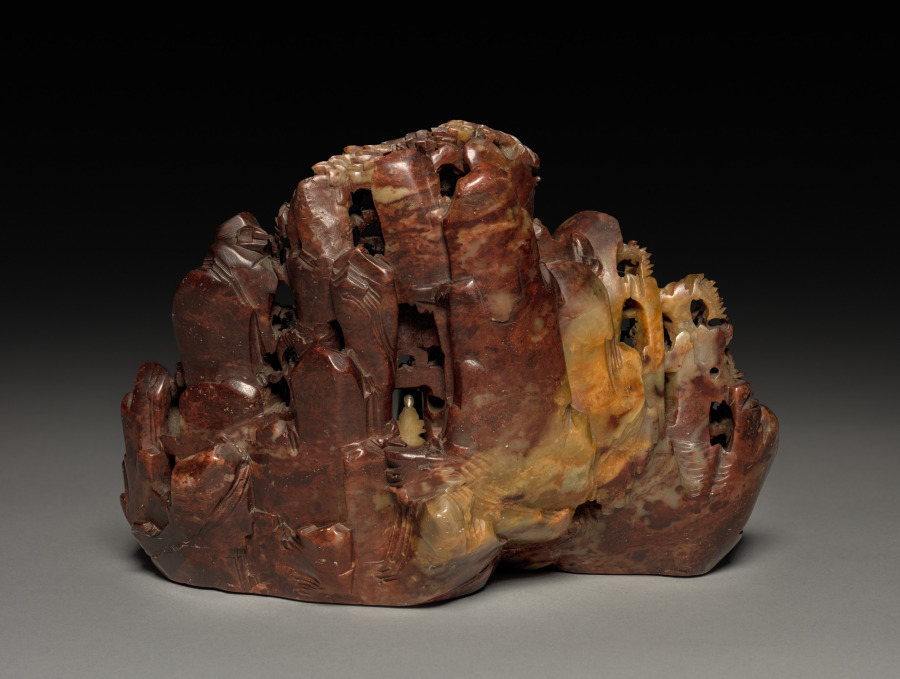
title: Landscape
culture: China, Qing dynasty (1644-1911)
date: 1644–1911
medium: soapstone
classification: Stone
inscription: 石門洞天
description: A mountain scenery surrounded by water and fish is meticulously carved out of soapstone, with a pond, bridge, waterfall, and temple front in its center. The unidentified figure scene on the left includes an ox and a man wearing what appears to be a Korean hat. A Buddha figure hidden in the depth of the temple can be glimpsed from the backside. The inscribed pillar on the right reads “Stonegate Cave to Heaven (shimen dongtian)”. Indentations all over the stone suggest that the miniature mountain was once adorned with precious stones and metal, presumably representing an earthly paradise to which one could escape in one’s mind and imagination.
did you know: A waterfall plummets down the cliff by the temple and then flows smoothly down to join the river at the front of the landscape scene.